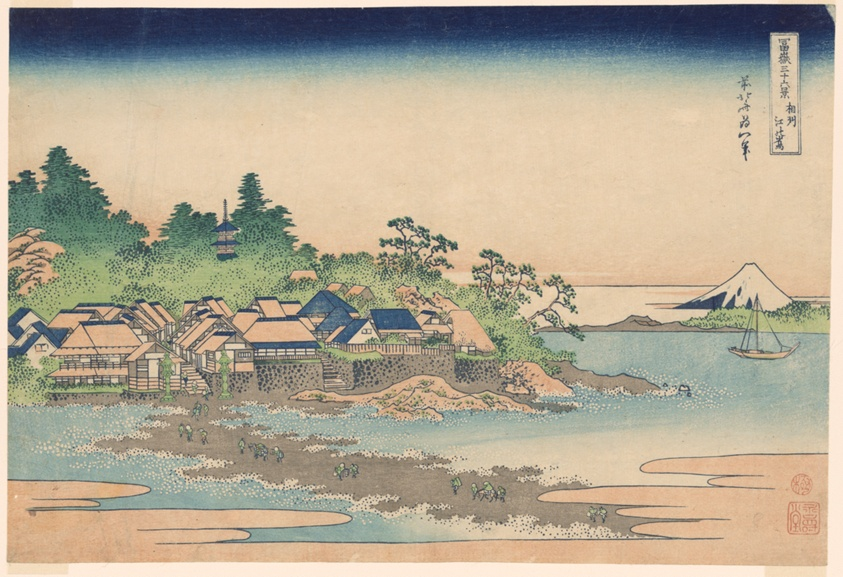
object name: Print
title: Enoshima Island in Sagami Province (Soshu Enoshima), from the series "Thirty-six Views of Mount Fuji (Fugaku sanjurokkei)"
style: Japanese (culture or style)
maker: Katsushika Hokusai 葛飾 北斎; Japanese, 1760-1849; Publisher: Hibino Yohachi; Japanese, unknown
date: c. 1830/33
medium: Color woodblock print; oban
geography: Japan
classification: woodblock print; print; asian art